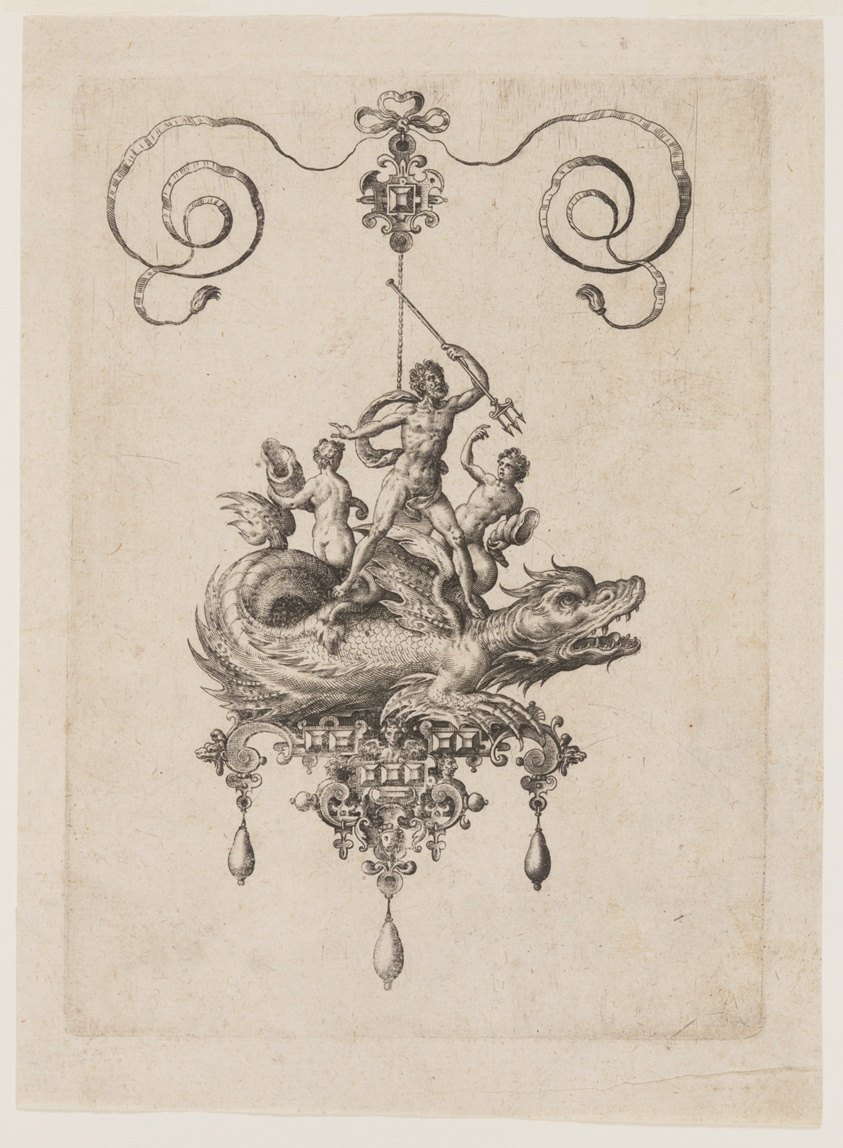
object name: Print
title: Designs for Pendants with Sea Monsters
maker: Adriaen Collaert (Flemish, c. 1560–1618); after Hans Collaert (Flemish, c. 1530–1581)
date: 1582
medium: Engraving on ivory laid paper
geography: Flanders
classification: engraving; paper; print; prints and drawing